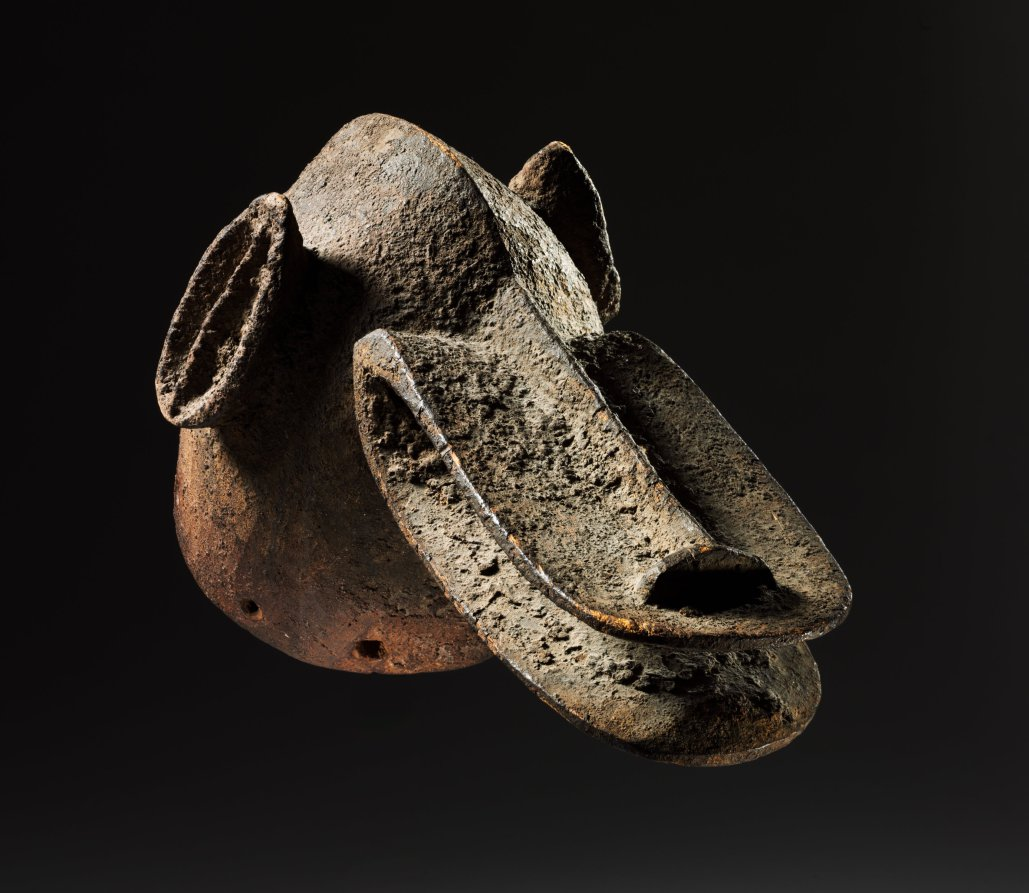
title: Helmet Mask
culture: Africa, West Africa, Mali, Bamana-style blacksmith-carver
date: possibly early to mid-1900s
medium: Wood and organic materials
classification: Mask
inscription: The inside of the mask bears the inscription with white ink of the number 107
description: Belonging to the Kono association, one of the Bamana people’s most powerful men’s groups, this mask’s shape seems to evoke the hyena, an animal reputed for its intelligence and its knowledge of the bush. The Kono’s main task is to offer its members protection against witchcraft. It is also responsible for fostering fertility, solving conflicts, disciplining troublemakers, and sentencing criminals. Masquerades are among the Kono’s most public expressions; the mask’s performance is characterized by energy and vigor.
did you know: This mask likely depicts a hyena, an animal known for its intellect and knowledge of the bush.